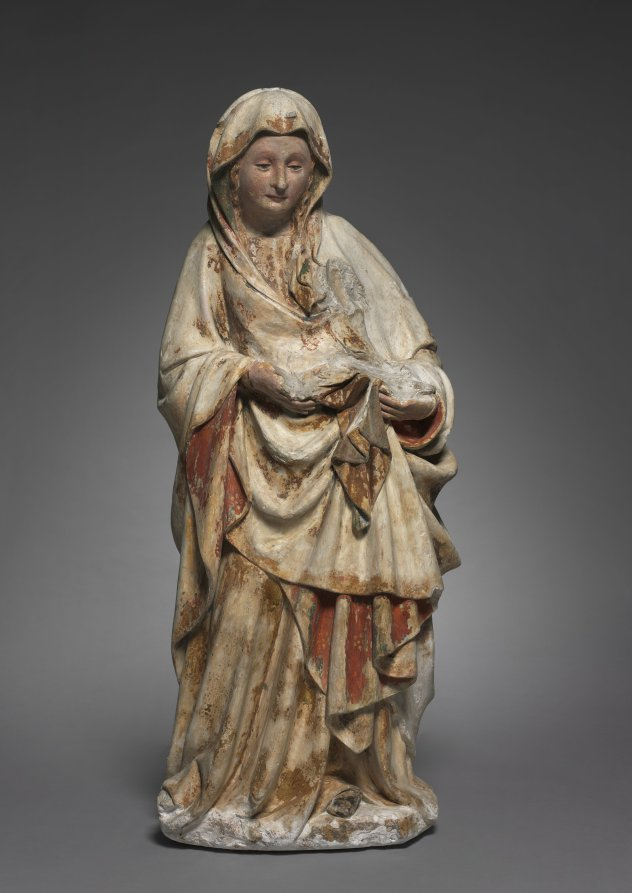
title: Standing Virgin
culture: Netherlands, active Dijon, 15th century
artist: follower of Claus de Werve (Netherlandish, 1380–1439)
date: c. 1440–1450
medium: painted and gilded limestone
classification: Sculpture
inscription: inscriptions on reverse.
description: This standing Virgin now lacks the child she once cradled in her left arm. The sculpture may have been damaged in the French Revolution by falling onto its face. It was carved from soft white limestone of a type known to be quarried at Asnières-lès-Dijon, near Champmol. The figure recalls many of the hallmarks of the style of Claus de Werve, a Netherlandish artist active at the court of Burgundy. The Virgin has a sweet, round face that is also smooth and fleshy, her eyelids droop pensively and she is engulfed in rich voluminous draperies that cascade in deep folds. This sculpture should be seen as a charming reflection of de Werve’s many Virgin and Child groups. It was probably carved by a follower closely acquainted with his style.